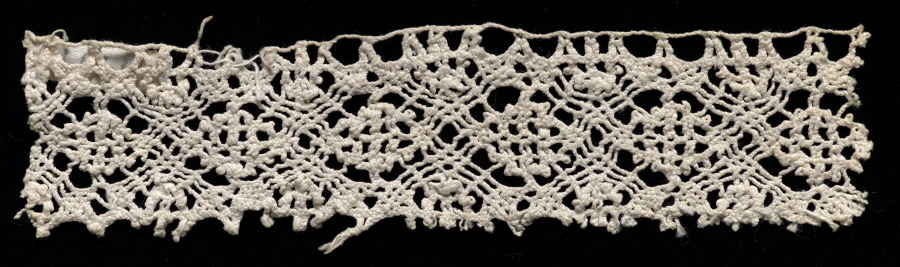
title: Lace Fragment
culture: Italy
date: 1600s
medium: Needle lace (punto avorio or ivory stitch) insertion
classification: Lace